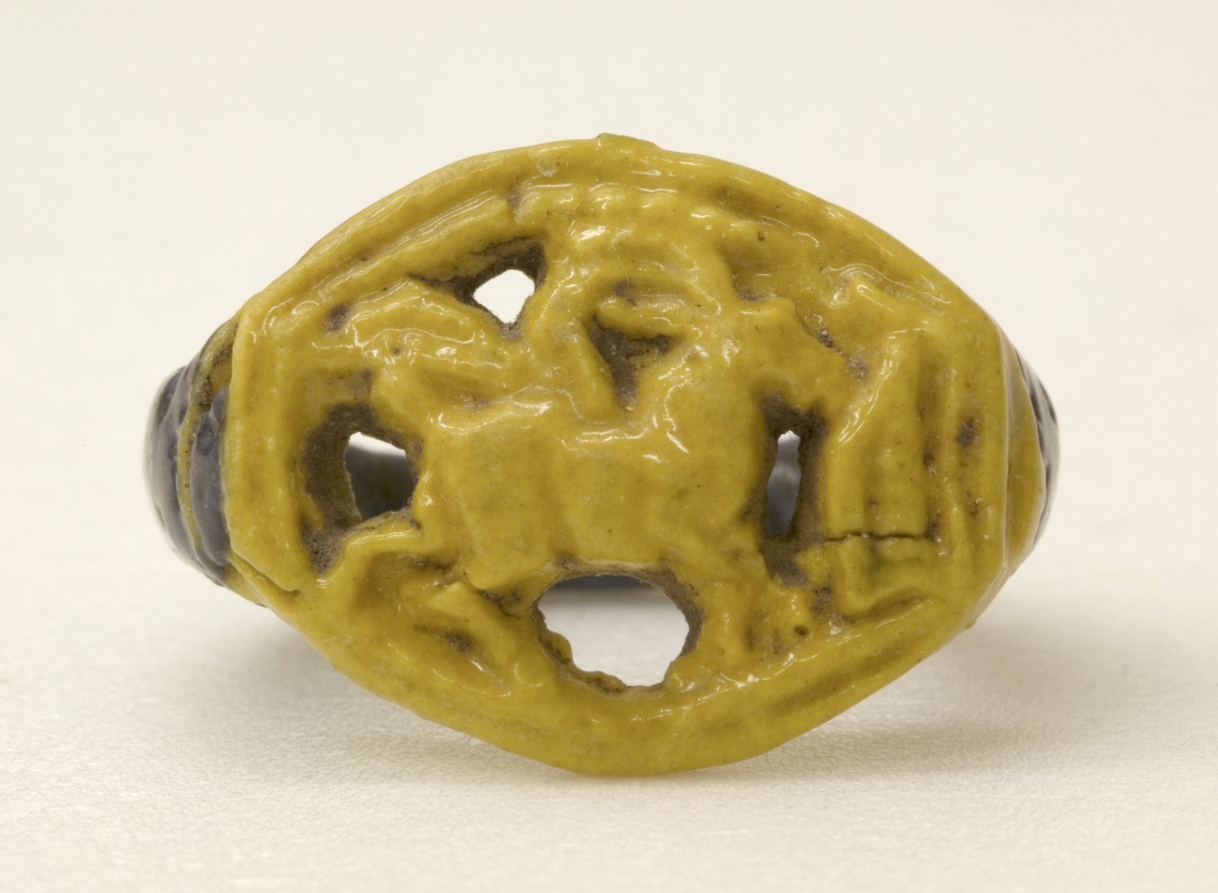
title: Ring: Gazelle Eating Thicket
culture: Egypt, New Kingdom (1540–1069 BCE), Dynasty 18, reign of Amenhotep III (1390–1352 BCE)–reign of Akhenaten (1351–1334 BCE)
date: 1391–1353 BCE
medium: polychrome faience (yellow and purple)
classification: Jewelry